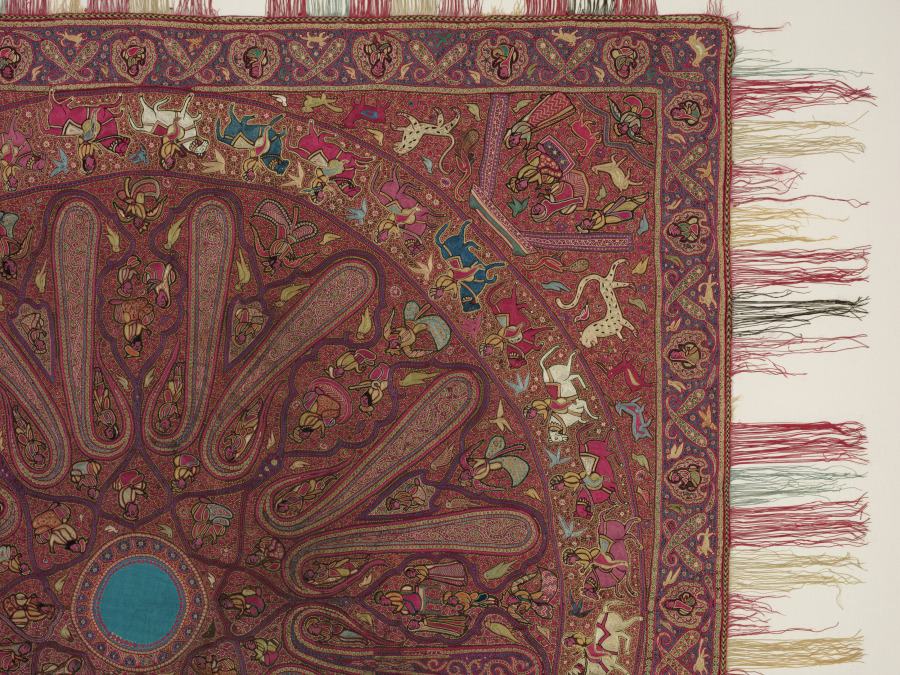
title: Square Shawl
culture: India, Kashmir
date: c. 1850–70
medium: Silk and silver filé, wool: chain stitch embroidery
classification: Embroidery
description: By the 1800s, the Himalayan foothill region of Kashmir was renowned for distinctive embroideries, and Kashmiri shawls were coveted by women throughout the British Empire. The center of this square shawl is in the form of an eight-petaled lotus, a symbol for the sun, and around it are the elongated forms of slender cypress trees, which became the inspiration for paisley. Every space is populated with figures: seated, standing, male, female, or playing musical instruments. Others are winged heavenly figures called peri. Birds are the only animals in these central spaces, suggesting a heavenly realm. In the next concentric ring riders in an equestrian procession alternate with flying birds. In the spandrels, the triangular sections between the circle and the square, are gatherings under a tent with animals. Some local Himalayan animals can be identified, such as the spotted snow leopard and the snake-eating markhor goat.